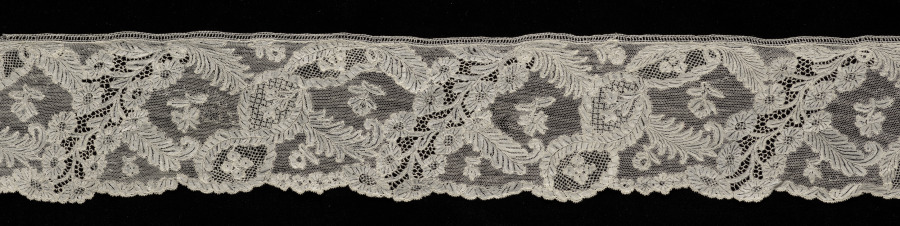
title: Lace Edging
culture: Italy, Burano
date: 1700s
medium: Linen: needle lace (Burano Point)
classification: Lace